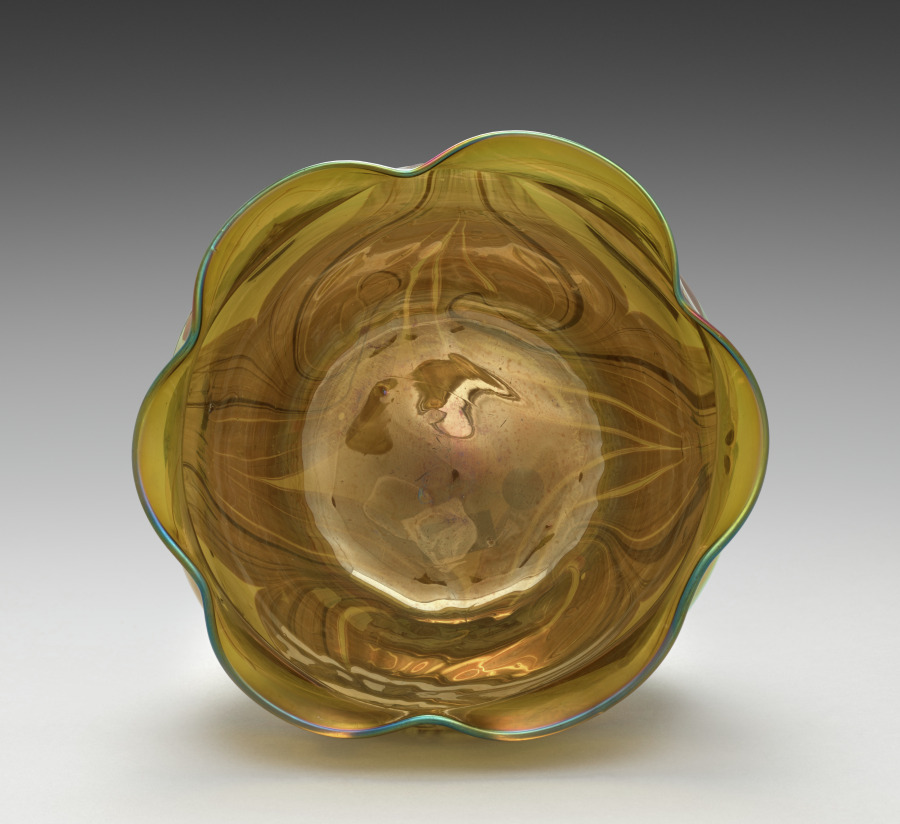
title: Bowl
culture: America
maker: Tiffany Glass & Decorating Company (America, New York, 1892–1902)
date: c. 1896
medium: Favrile glass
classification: Glass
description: Among his many achievements in the decorative arts, Louis Comfort Tiffany invented a type of glass with unprecedented opalescence that he patented under the name Favrile, derived from an Old English word meaning "handcrafted." Tiffany memorably described his Favrile glass as "distinguished by brilliant or deeply toned colors, usually iridescent like the wings of certain American butterflies, the necks of pigeons and peacocks, the wing covers of various beetles."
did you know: Located in Lake View Cemetery in Cleveland, Wade Memorial Chapel features an interior designed by Tiffany.